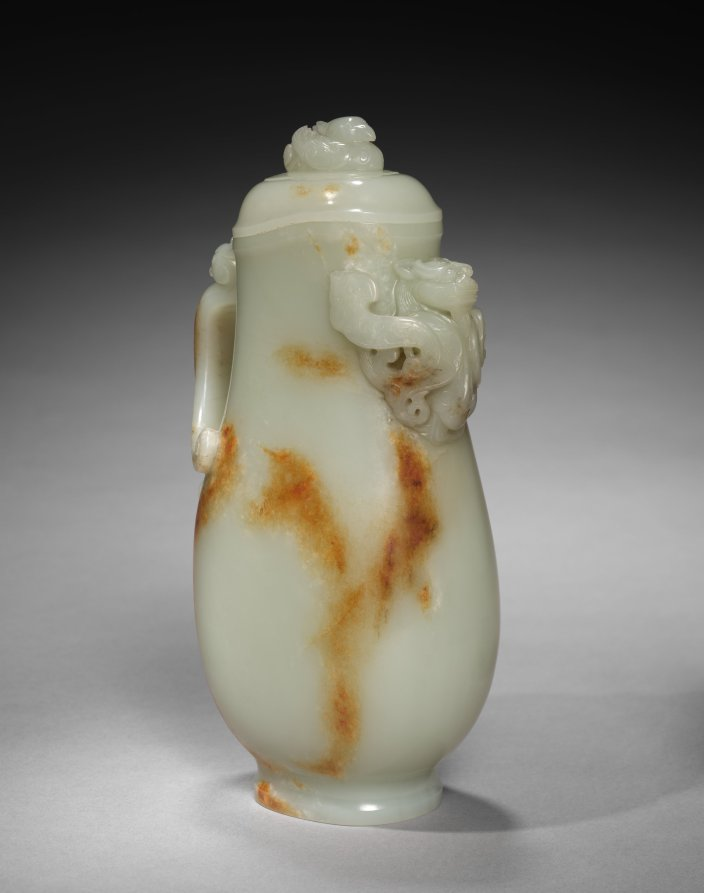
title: Pitcher (Gong) with Dragon and Bird-Headed Handle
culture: China, Qing dynasty (1644–1911)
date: 1700s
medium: pale greenish-white jade with brown markings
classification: Jade